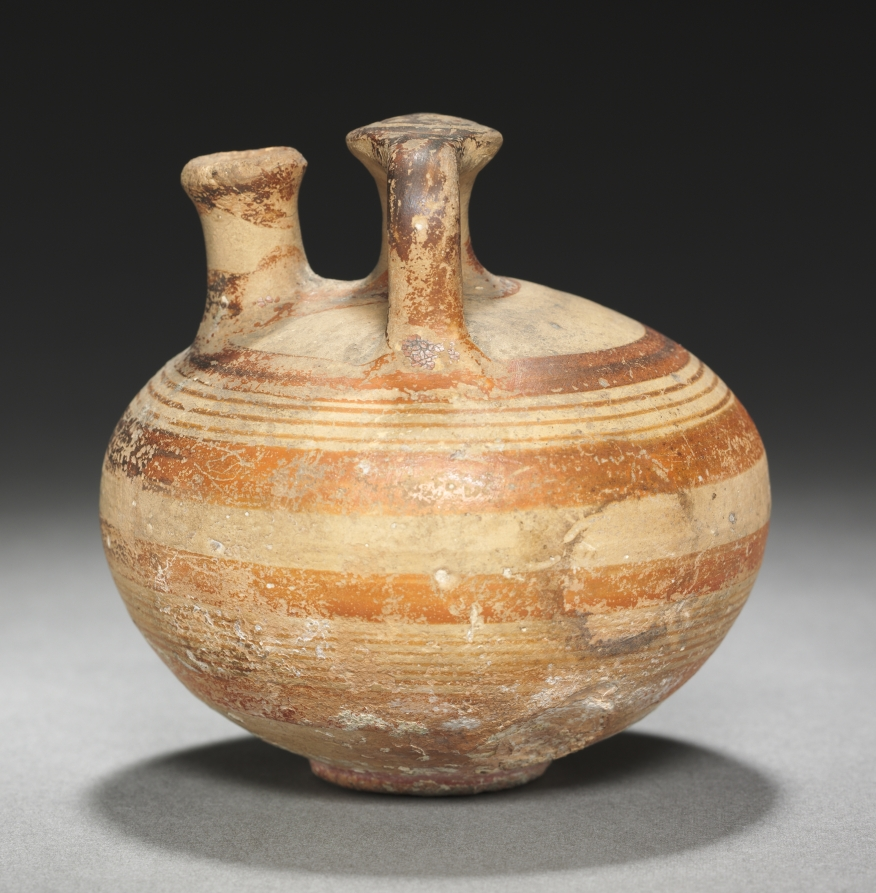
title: Miniature Stirrup Jar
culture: Cyprus, late Helladic III A2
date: c. 1350–1300 BCE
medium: Cypro-Mycenaean ware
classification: Ceramic